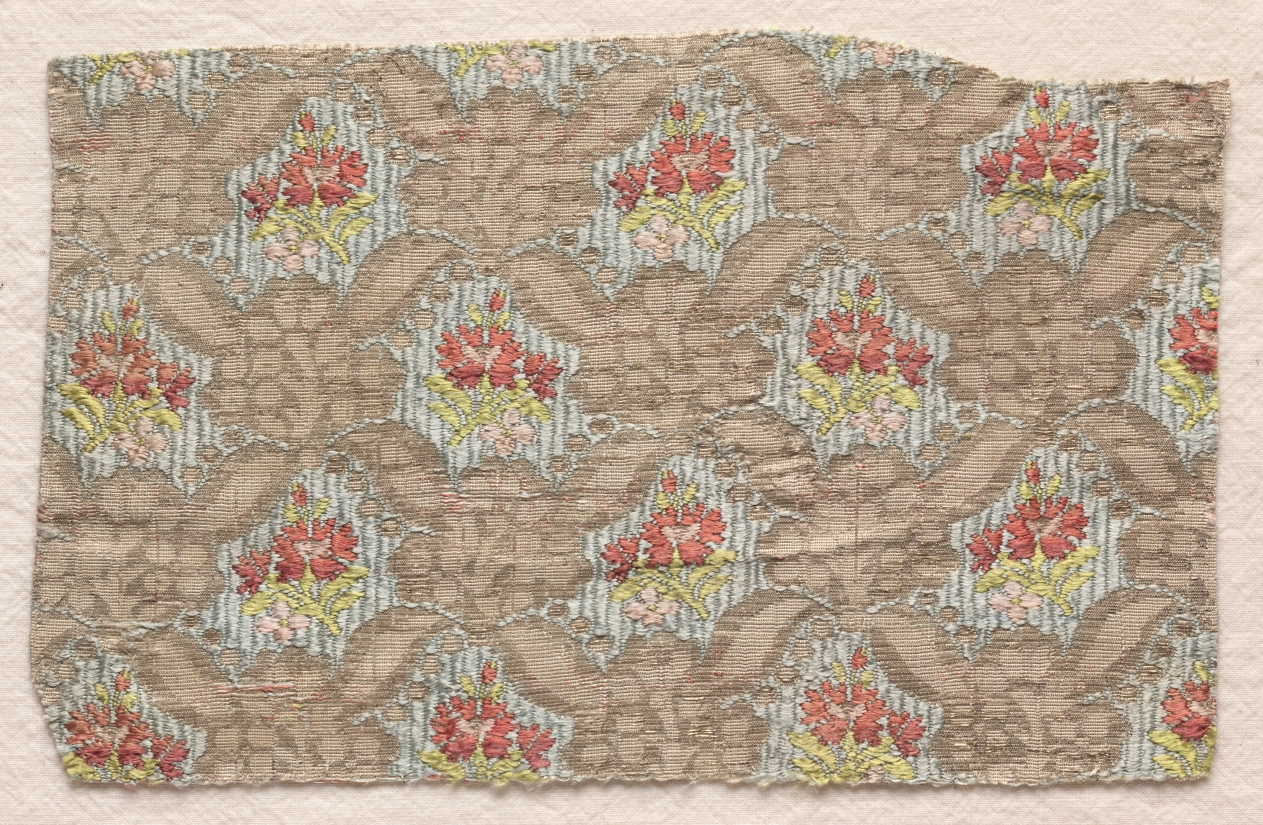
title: Textile Fragment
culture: France, late 18th century, Period of Louis XVI (1774-1793)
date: 1774–1793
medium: Droguet; silk and gold thread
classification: Textile